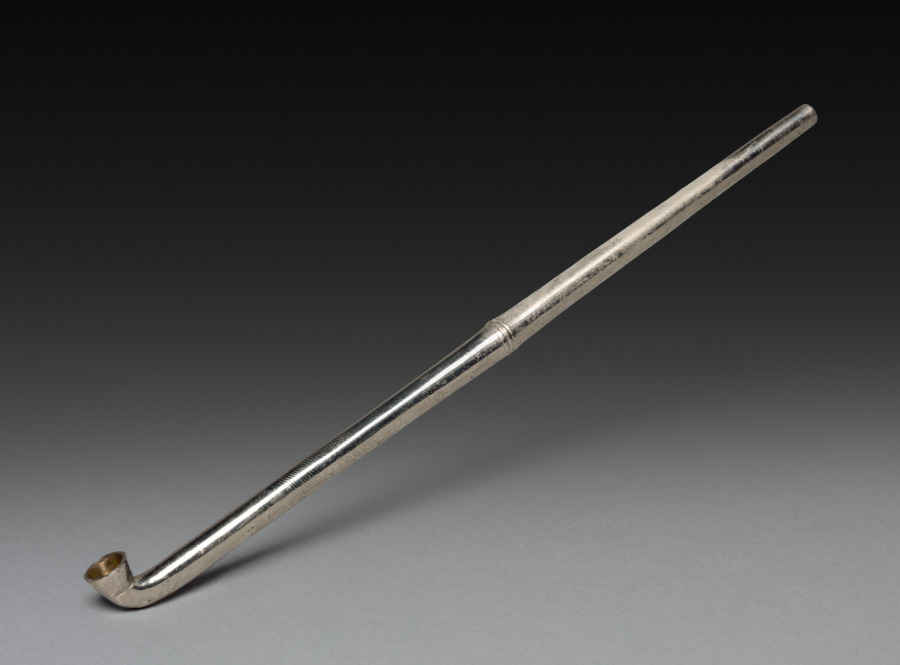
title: Tobacco Pipe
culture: Japan, Meiji period (1868–1912)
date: 1900s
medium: metal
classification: Miscellaneous